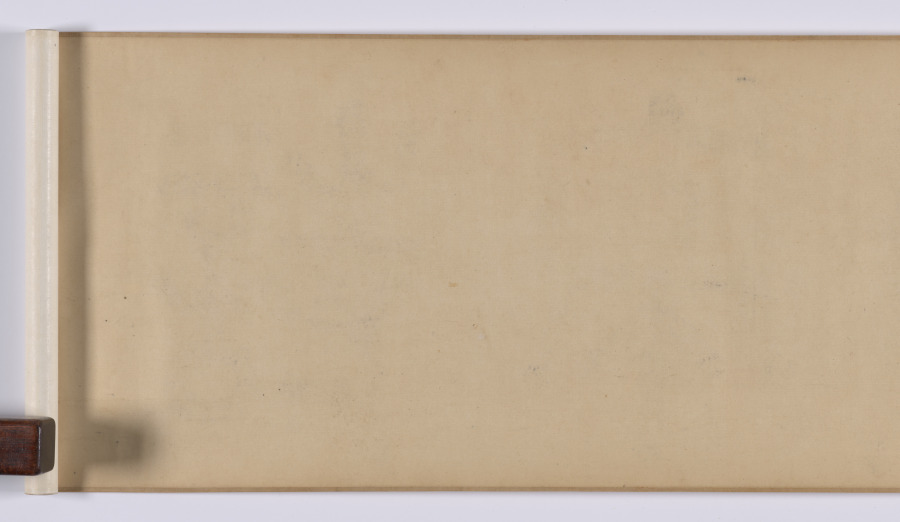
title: Poetic Feeling in a Thatched Pavilion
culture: China, Yuan dynasty (1271-1368)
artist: Wu Zhen (Chinese, 1280–1354)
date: 1347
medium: handscroll; ink on paper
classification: Painting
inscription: 依村構草亭，端方意匠宏。 林深禽鳥樂，塵遠竹松輕。 泉石俱延賞，琴書悅性情。 何當謝凡近，任適慰平生。 至正七年丁亥冬十月，為元澤戲作草亭詩意。梅沙彌書 [印]楳華盦; 嘉興吳鎮仲圭書畫記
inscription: 我愛梅花翁，巨老傳心印。 脩此水墨缘，種種得蒼潤。 樹石墮筆鋒，造化不能吝。 而今橡林下，我願執掃汛。 後學沈周 [印]启南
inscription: Colophon by Chen Rentao (1952): 予求梅道人畫二十年不可得。所見多膺鼎，即故宮所藏山水數軸都不可靠。傳世真迹，惟《漁父圖》、《嘉禾八景》與此《草亭詩意》而已。壬辰十月十四日余大病初愈，居家休養，研山師忽持此圖相贈。展卷披覽，頓覺精神沛振，如服僊藥。同日又得宋拓柳公權《神策軍紀聖德碑》，及群玉堂藏《真草書千(字)文》，皆海內孤本。一日得數寶，欣喜何如，書以志幸。 陳仁濤識 [印]陳氏仁濤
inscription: Colophon by Chen Rentao: 此圖作於至正七年丁亥，時年六十八，盖其晚年神品也。 濤又識 [印]陳仁濤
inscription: Title on frontispiece by Li Dongyang 李東陽 (1447-1516).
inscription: 33 additional seals: 1 seal of Li Chao-heng 李肇亨 (1592-1664)：檇李李肇亨書畫記; 9 seals of Liang Qingbiao 梁清標 (1620-1691): 蒼巖子、蕉林、蕉林梁氏書畫之印、蕉林秘玩、蕉林書屋、蕉林玉立氏圖書、棠邨 (appears twice)、棠邨審定; 1 seal of Wang Yirong (1845-1900): 懿榮; 3 seal of Li Yanshan (1898-1961): 雙銕笛樓 (appears twice)、硯山心賞; 12 seals of Chen Rentao 陳仁濤（1906-1968）：陳氏仁濤、陳仁濤珍藏印、金匱寶藏·陳氏仁濤 (appears three times)、金匱秘笈、金匱室、金匱室精鑒璽 (appears twice)、金匱室主、金匱神品、仁濤奇緣; 1 seal: 崐溟居士; 1 seal: 林止在㭯生圖書印; 3 seals unidentified.